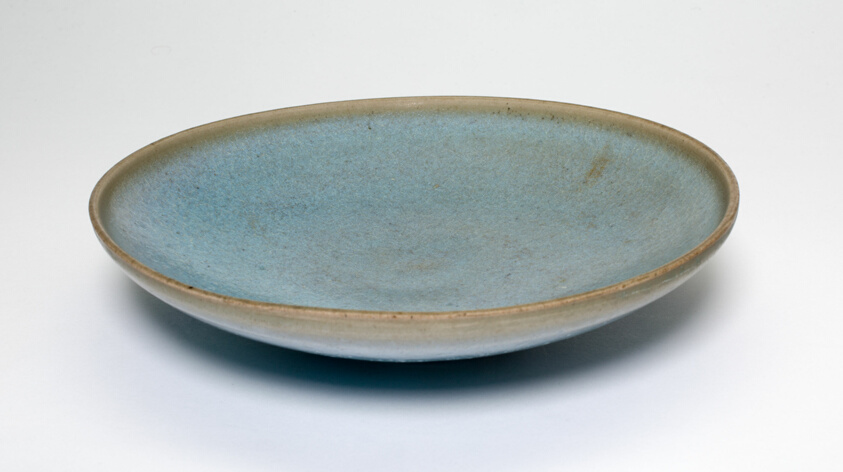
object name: Vessel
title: Dish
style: Chinese (culture or style)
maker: China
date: Jin dynasty (1115–1234), 13th century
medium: Jun ware; stoneware with light blue glaze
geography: China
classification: dish (vessel); stoneware; asian art; ceramics; vessel